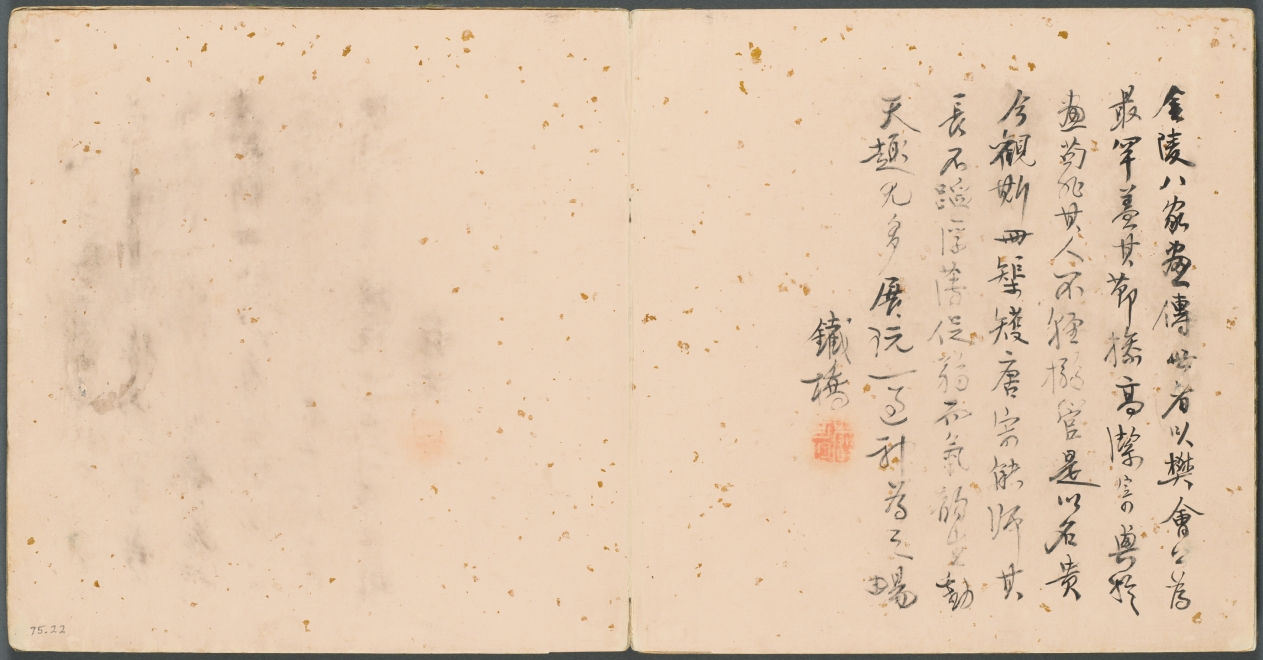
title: Album of Miscellaneous Subjects, Colophon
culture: China, Qing dynasty (1644-1911)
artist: Fan Qi (Chinese, 1616–after 1694)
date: early 1650s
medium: album leaf, ink and color on silk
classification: Painting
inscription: 1 colophon and 1 seal of Tomioka Tessai 富岡鐵齋 (1836-1924)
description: The Japanese artist Tomioka Tessai (1836-1924) adds a colophon on the last page, commenting on the rarity of Fan Qi's paintings among those of the Eight Masters of Nanjing. They were modeled after Tang and Song masters and captured the rhythms of life. "Whenever I open this album, my mind is pleased," he writes.